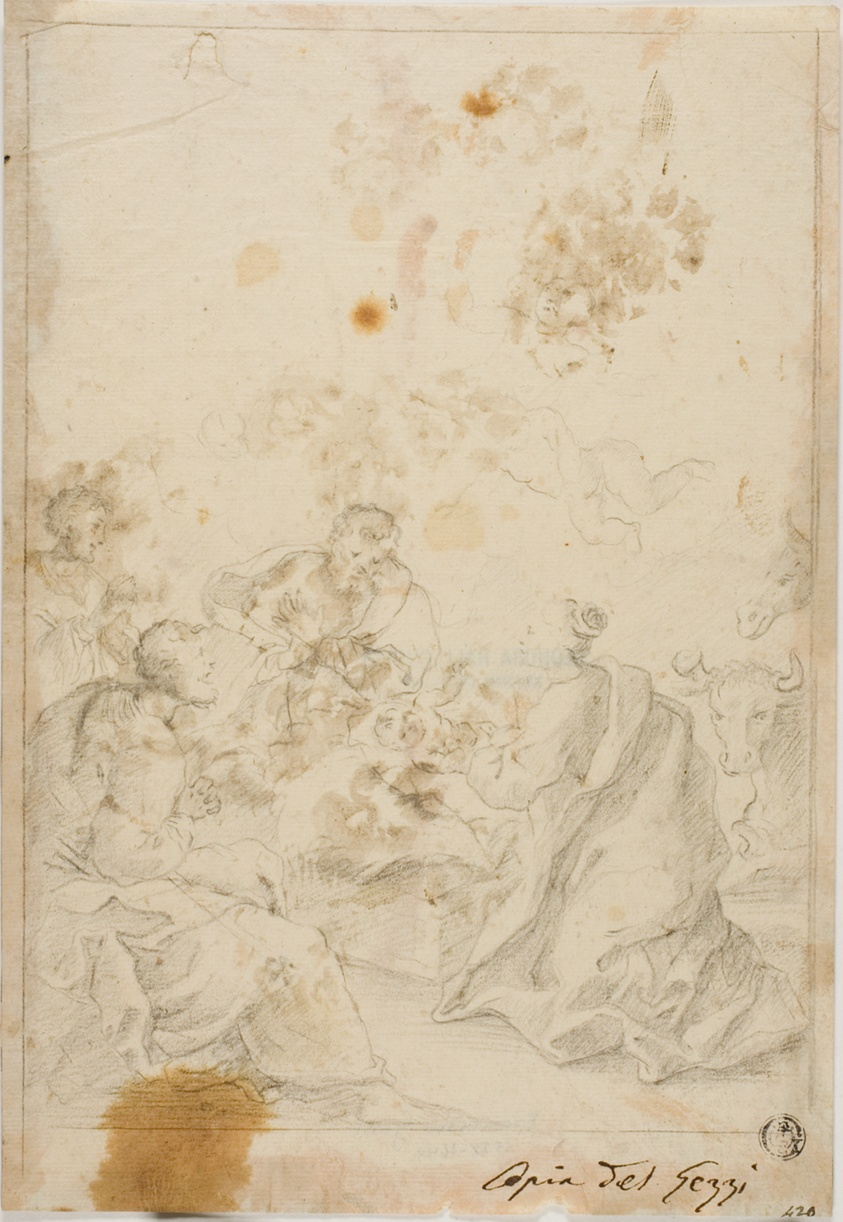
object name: Drawing and Watercolor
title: Adoration of the Shepherds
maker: After Pier Leone Ghezzi (Italian, 1674-1755); or Giovan Francesco Gessi (Italian, 1588-1649)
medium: Black chalk on cream laid paper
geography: Italy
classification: chalk; drawings (visual works); prints and drawing